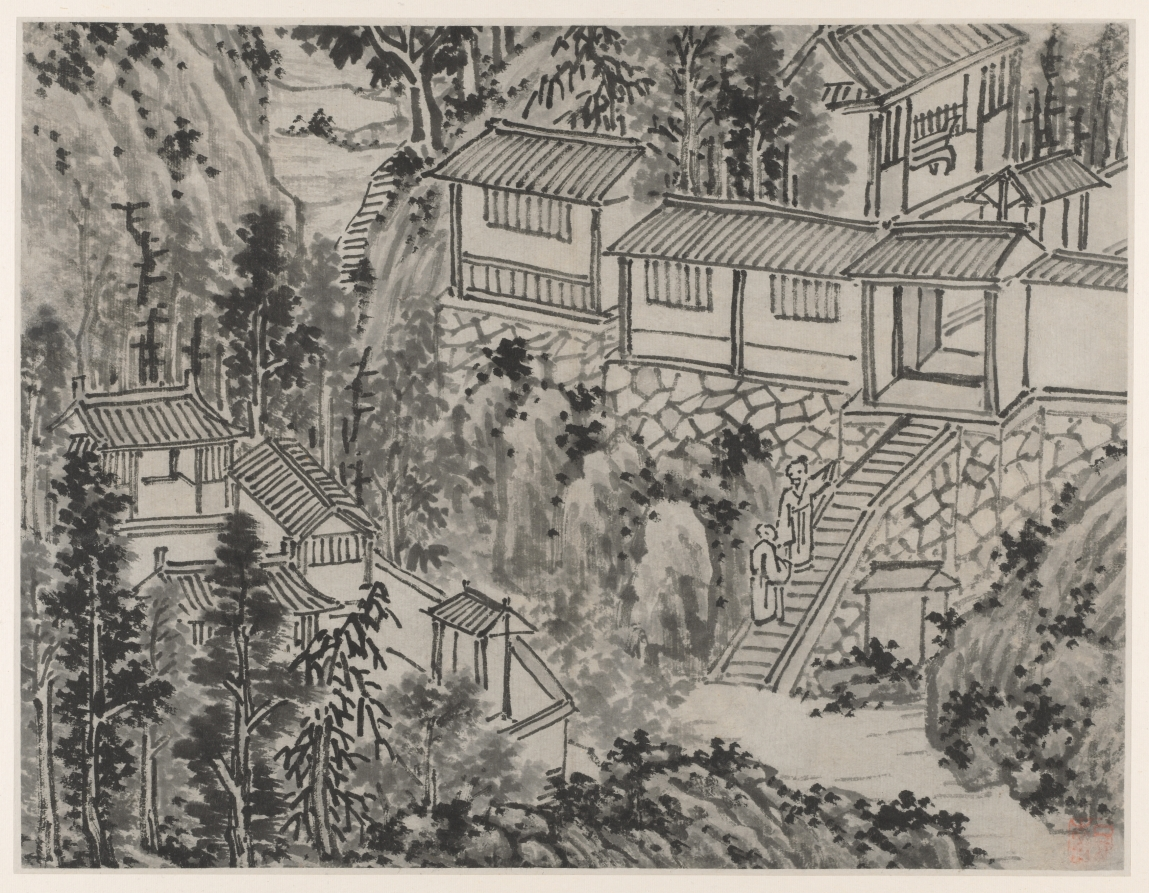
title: The Pine Retreat, from Twelve Views of Tiger Hill, Suzhou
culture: China, Ming dynasty (1368–1644)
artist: Shen Zhou (Chinese, 1427–1509)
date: after 1490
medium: Album leaf; ink on paper or ink and slight color on paper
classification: Painting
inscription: [印] 启南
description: Views of Tiger Hill depicts a historic site a few miles northwest of Suzhou. The scenes simulate a visit from arriving by boat at the foot of the mountain to climbing to Cloudy Cliff Monastery. Representations of the artist’s mature style, Shen Zhou included views in subtle colors in the suite of monochrome scenes. A Suzhou native, Shen Zhou was supported by family wealth and rejected an official career in favor of life as a retired scholar. Turning to painting in midlife, he is regarded as the founder of the Wu School of painting, with its center in Suzhou.